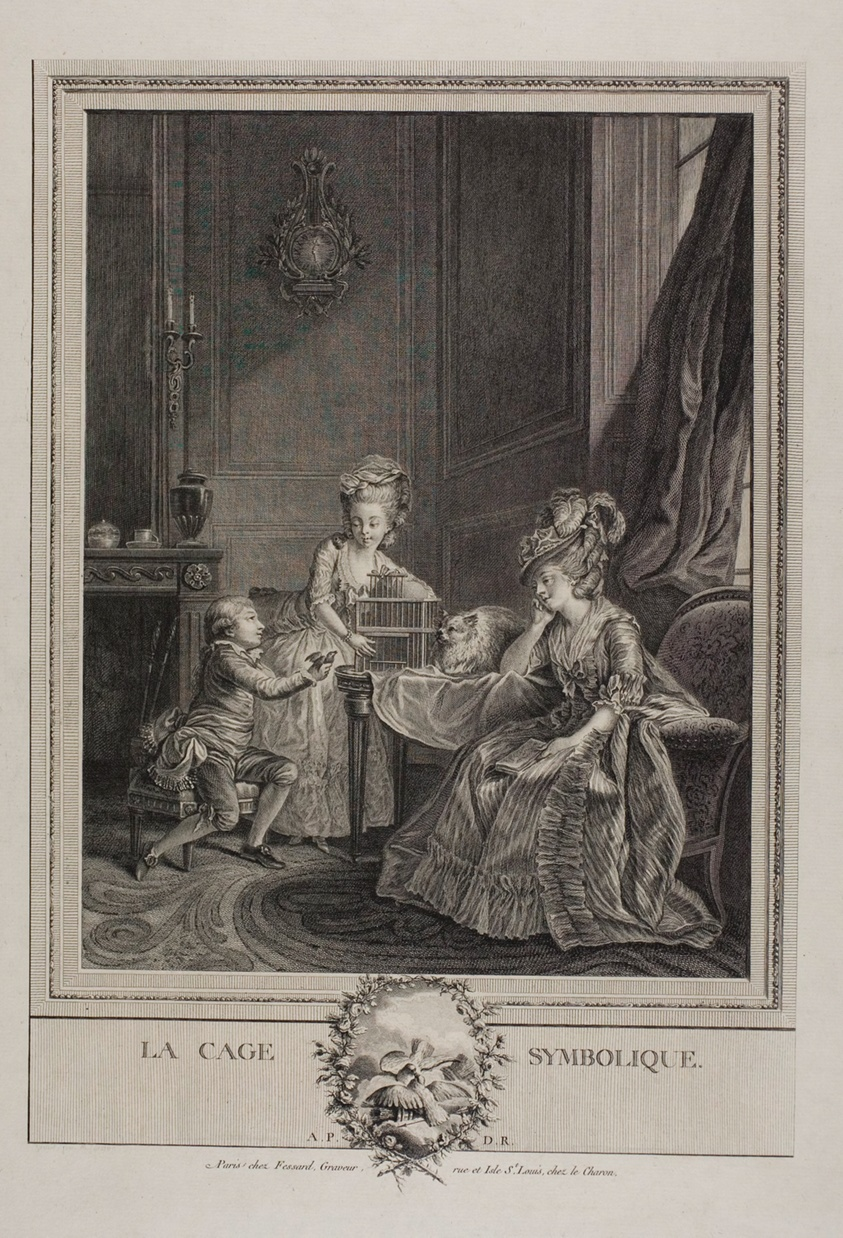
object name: Print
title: Symbolic Cage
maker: Étienne Fessard; French, 1714-1777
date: 1760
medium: Etching on paper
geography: France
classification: etching; print; prints and drawing